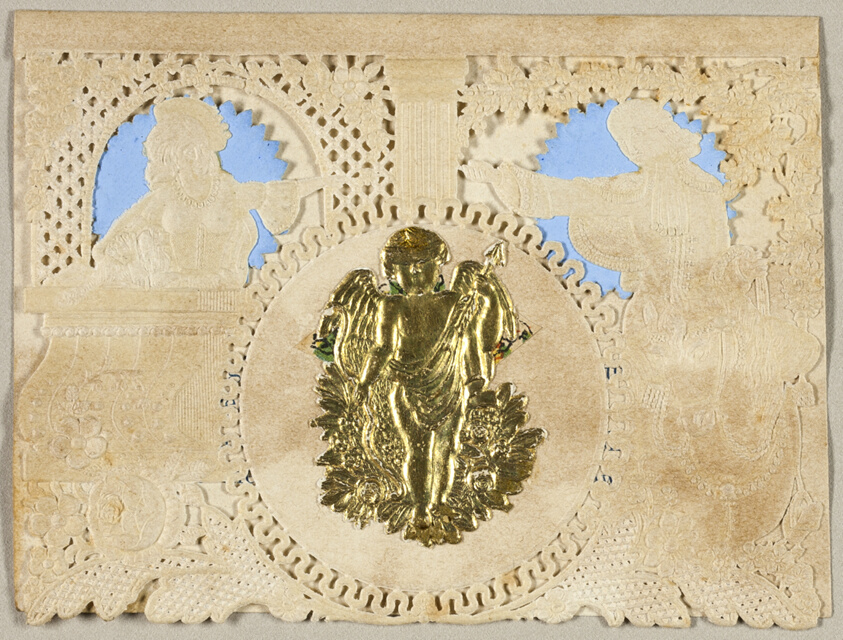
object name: Drawing and Watercolor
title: Untitled Valentine (Gold Cupid)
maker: Unknown Artist; American or English, 19th century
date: c. 1850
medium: Collaged elements on cut and embossed (designed) cream wove paper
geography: United States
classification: collage; valentine; prints and drawing; paper